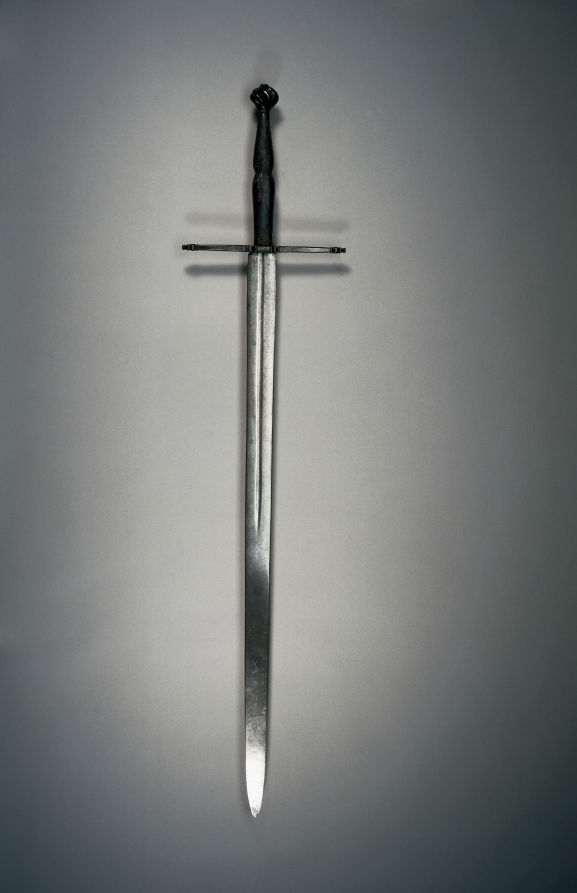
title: Hand-and-a-Half Sword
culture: South Germany, early 16th Century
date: c. 1500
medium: steel, wood, leather; quillions and spirally fluted pommel of blackened steel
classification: Arms and Armor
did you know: This sword came to be called a hand-and-a-half, because it could either be used with both hands or just one.